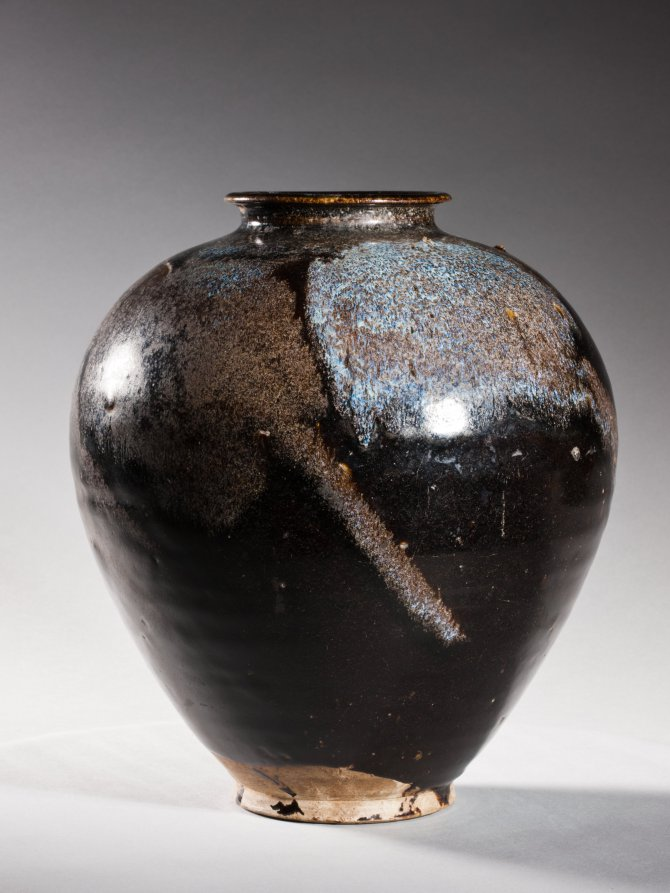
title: Jar: Black Ware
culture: China, Henan province, Huangdao kilns, Tang dynasty (618-907)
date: 700s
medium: glazed stoneware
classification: Ceramic